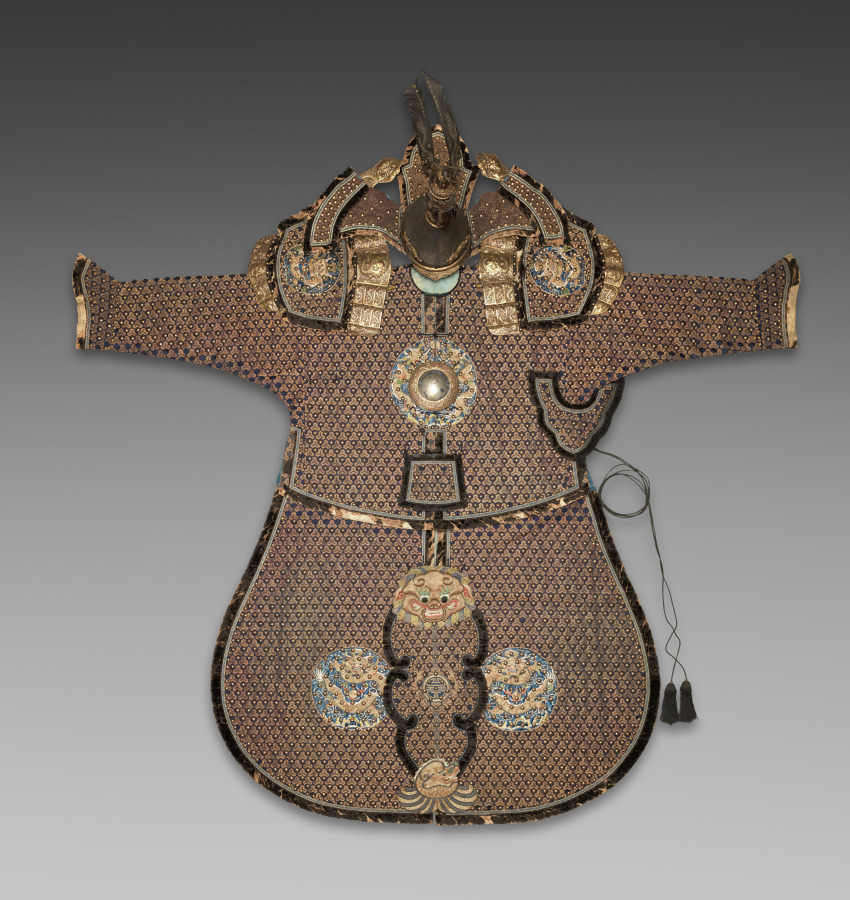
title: Ceremonial Uniform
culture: China, Qing dynasty (1644-1911)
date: 1644–1911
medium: satin weave silk with gold metal thread embroidery; supplementary weft; black velvet; metal (brass?); lined in blue silk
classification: Arms and Armor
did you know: The ceremonial uniform was considerably heavy; the jacket alone weighs 2.38 kg (5.25 lbs).